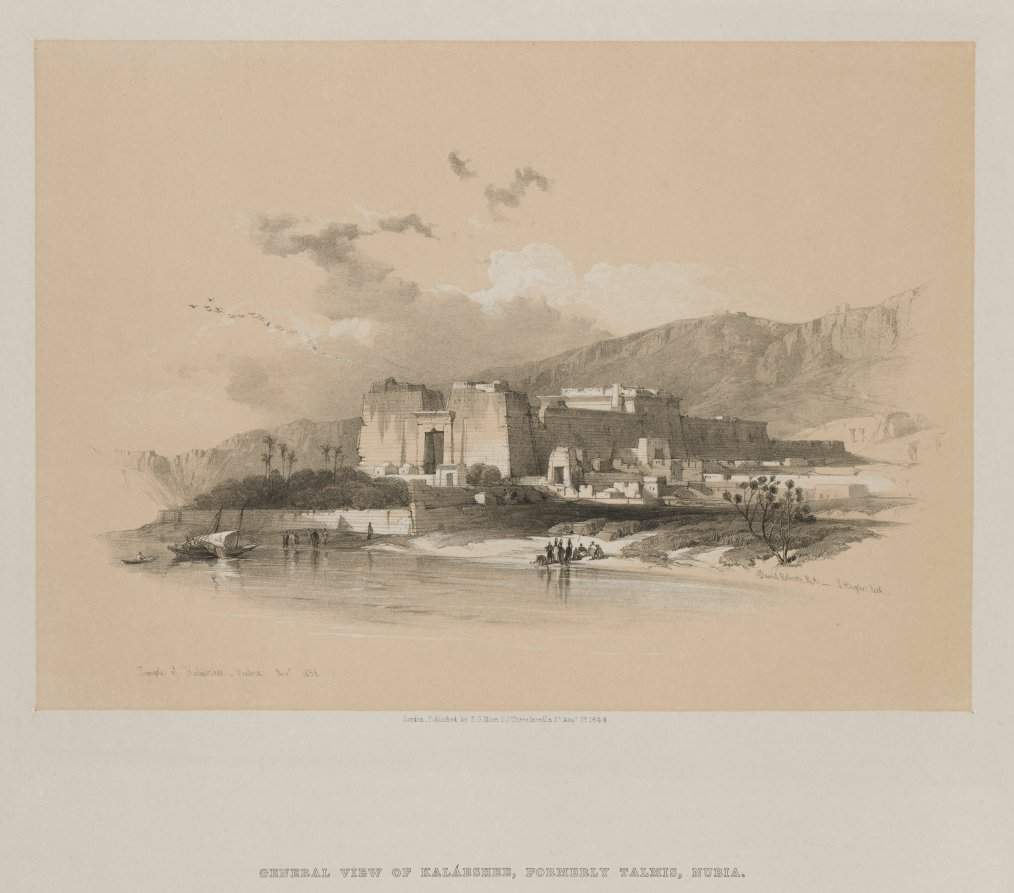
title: Egypt and Nubia, Volume II: Temple of Kababshe, Nubia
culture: England, 19th century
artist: Louis Haghe (British, 1806–1885)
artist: after David Roberts (Scottish, 1796–1864)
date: 1848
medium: color lithograph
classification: Print